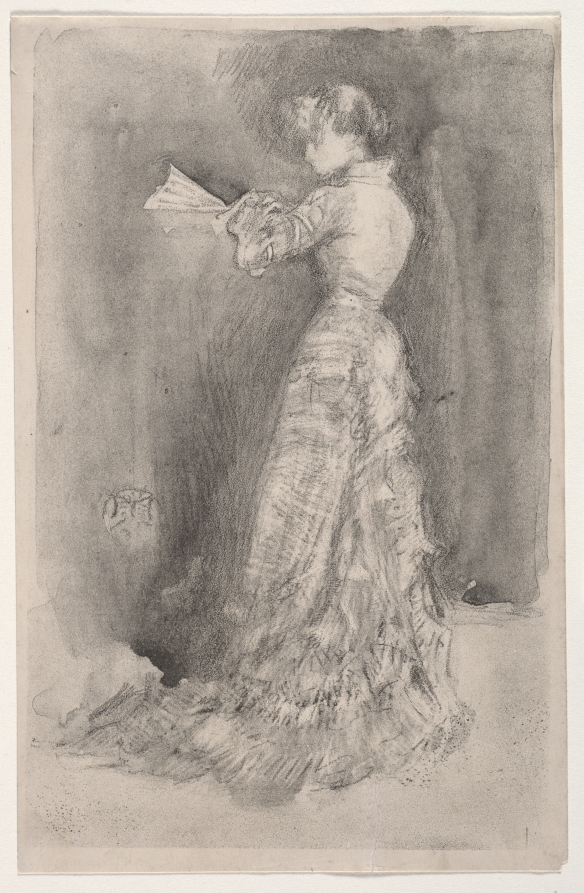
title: The Toilet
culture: America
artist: James McNeill Whistler (American, 1834–1903)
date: 1878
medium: lithograph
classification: Print